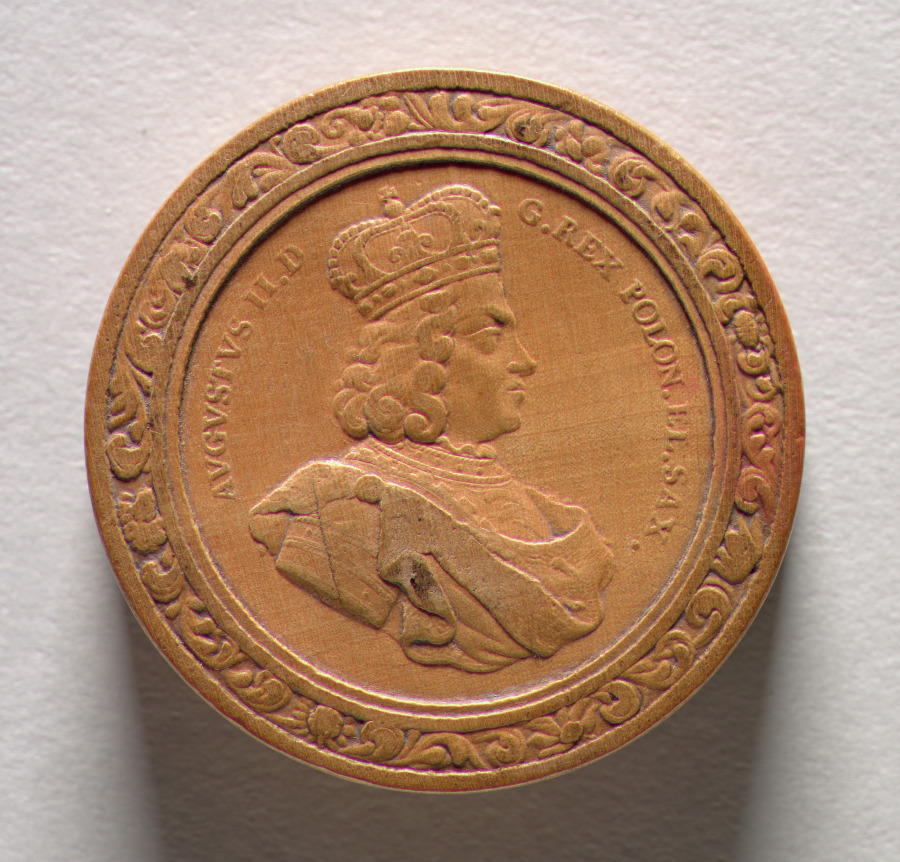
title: Gaming Piece (obverse)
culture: Germany, late 17th-early 18th Century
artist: Martin Brunner (German, 1659–1725)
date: c.1700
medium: wood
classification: Furniture and woodwork